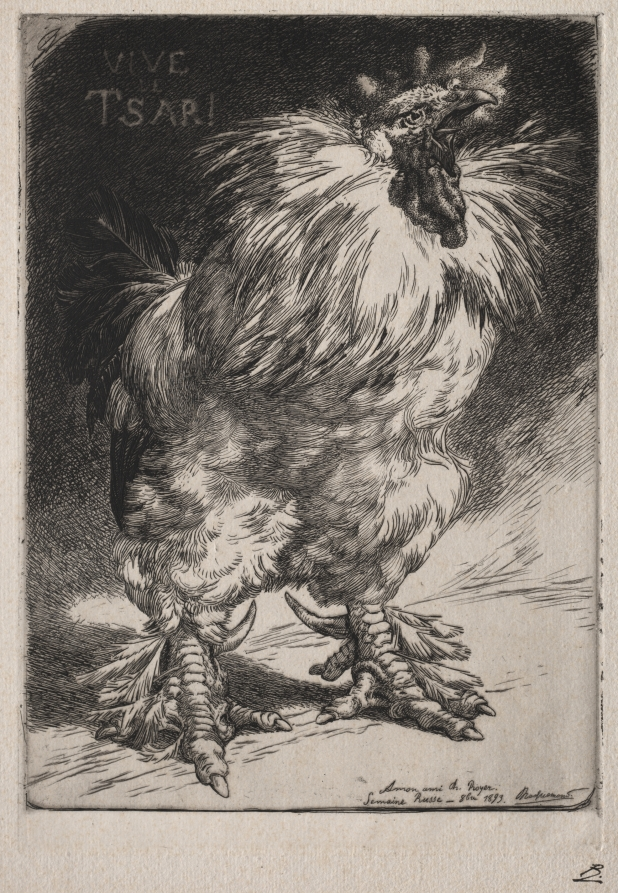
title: The French Cock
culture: France, 19th century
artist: Félix Bracquemond (French, 1833–1914)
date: 1893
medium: etching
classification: Print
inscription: printed in the plate, lower right: À mon ami Ch. Royer, Semaine russe --8 bre 1893. Braquemond